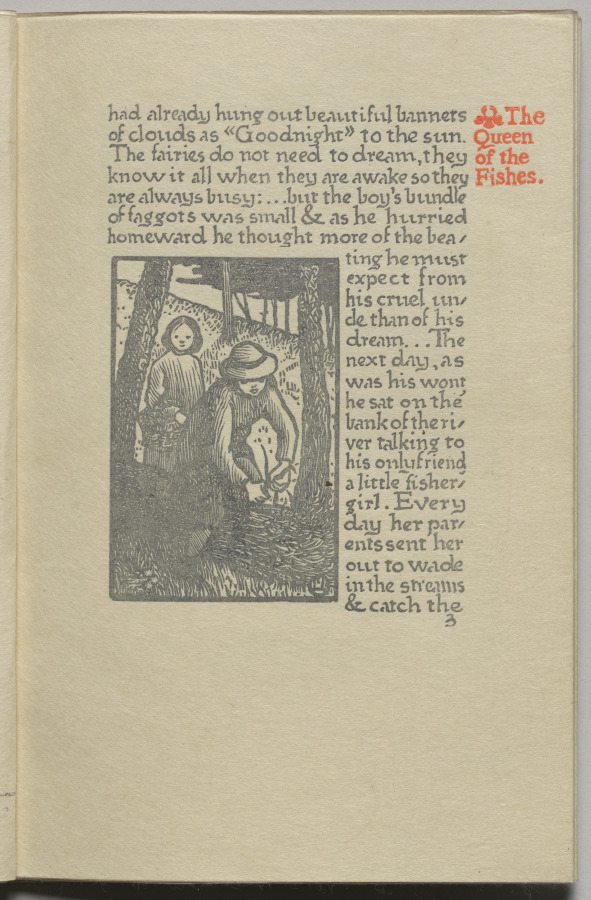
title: The Queen of the Fishes: Plate 3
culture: England, 19th century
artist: Lucien Pissarro (British, 1863–1944)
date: 1894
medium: woodcut printed in gray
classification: Bound Volume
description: Pissarro, son of the French Impressionist artist Camille Pissarro, moved to England in 1890. By 1894 he and his wife, Esther Bensusan Pissarro, had bought a printing press and established the Eragny Press. Influenced by William Morris, they were involved in every step of the production process: designing, cutting the woodblocks, setting type, and printing. The first book published by Ergany Press, The Queen of the Fishes, is based on an old fairy tale in which a peasant boy and girl escape the hardships of their lives by fantasizing that they have been turned into a giant oak and a splendid fish, respectively.